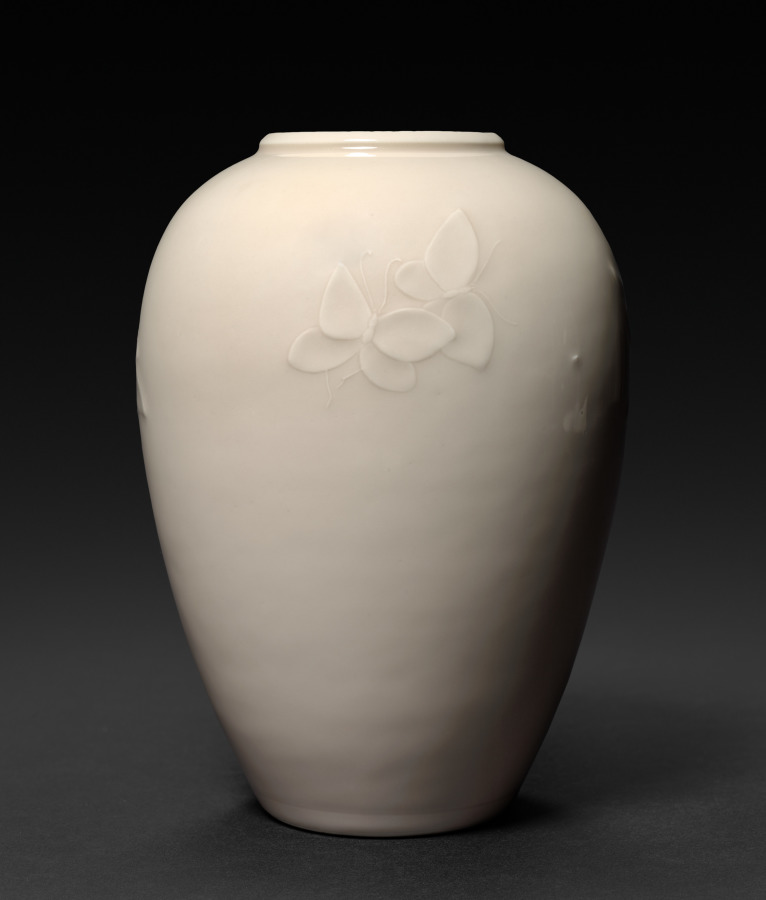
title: Vase with Peonies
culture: Japan, Meiji period (1868–1912)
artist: Seifū Yohei III (Japanese, 1851–1914)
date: 1900–1914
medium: Porcelain with molded and carved design and pink-infused cream glaze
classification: Ceramic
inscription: 清風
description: This flower vase has a creamy white glaze infused with pink. Sadly, the box has been lost, so we cannot know how it was described by the studio. However, through comparison with other works, it is possible to surmise that the work can be categorized as kanpakuji with in-glaze pink. A single huge blossom shoots up into the widest part of the vessel, near the top, so it will be visible from a distance. If this design is displayed in a space with a decorative alcove located some distance away from the entrance, even at a remove, it can announce the taste of its owner and immediately please a guest. On the other side of the vase, two butterflies, their wings overlapping, flit through the sky.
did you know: One of Seifū Yohei III’s most visually impactful techniques was to combine complex low-relief designs in clay surrounded by diffused underglaze blue or pink, which he then covered with a transparent or translucent glaze.